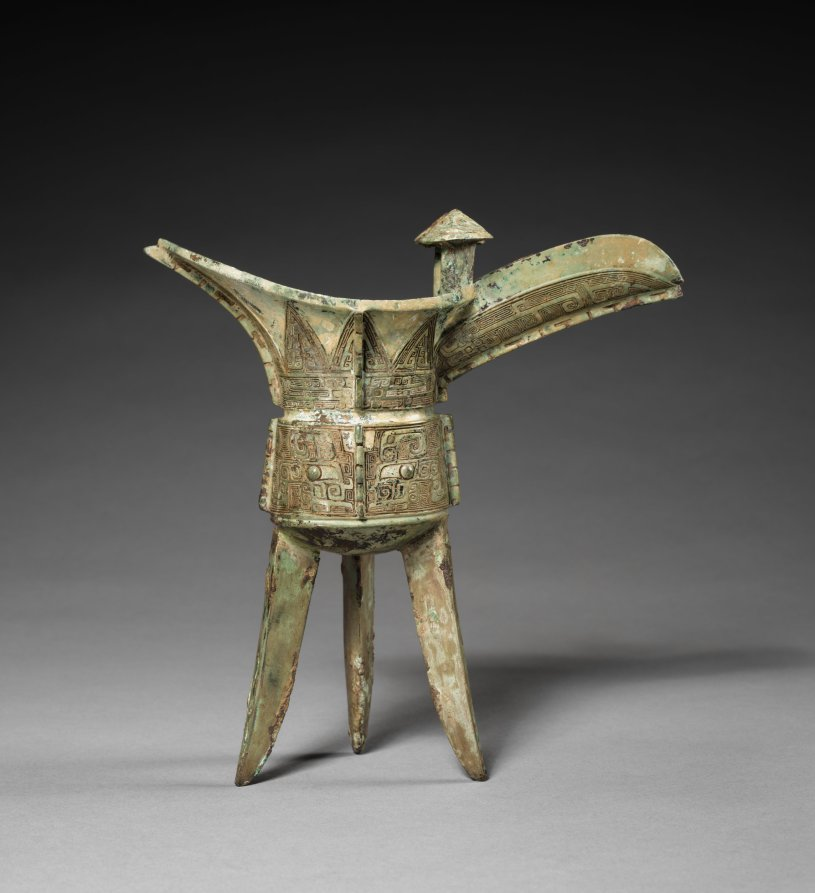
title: Wine Cups (Jue)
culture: China, Shang dynasty (c. 1600–c. 1046 BCE), Anyang phase (c. 1250–1046 BCE)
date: c. 1200 BCE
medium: bronze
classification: Metalwork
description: Wine and food played a major role in ritual offerings to the ancestral spirits and the Supreme Ancestor (Shangdi) performed by the Shang rulers in the state cult of ancestor worship. A variety of wine vessels—each type given a specific name—was cast to bear witness to the power and artistic vitality of this remote civilization. This example of a jue wine cup is for libations. Other major types of wine vessels include jia (wine warming vessel), fangyou (square wine container), and gu (beaker with a trumpeted mouth for pouring).